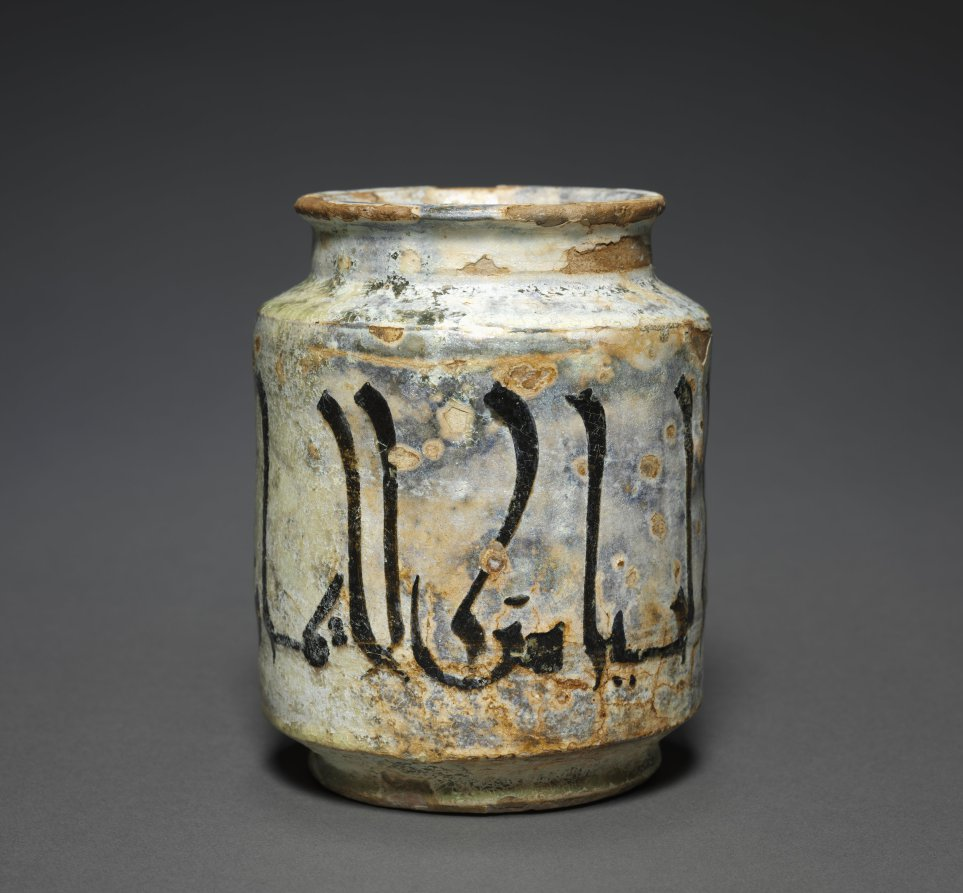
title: Albarello Jar with an Aphorism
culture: Central Asia, Samarkand, Samanid period (819–1005)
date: 900s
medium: Earthenware with underglaze decoration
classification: Ceramic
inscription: In Arabic: al-haya min al-iman w'al-iman min al-janna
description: The albarello was a jar designed to hold ointments and drugs for pharmacists. They were produced in the Middle East and Spain, as well as late medieval and Renaissance Italy. Albarellos are usually painted with floral, vegetal, or geometric designs. Arabic inscriptions are less common but here the elegant text reads: “Modesty [comes] from faith, and faith [comes] from Paradise,” attributed to the Prophet Muhammad.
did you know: The jar's Arabic inscription written in Eastern Kufic script.